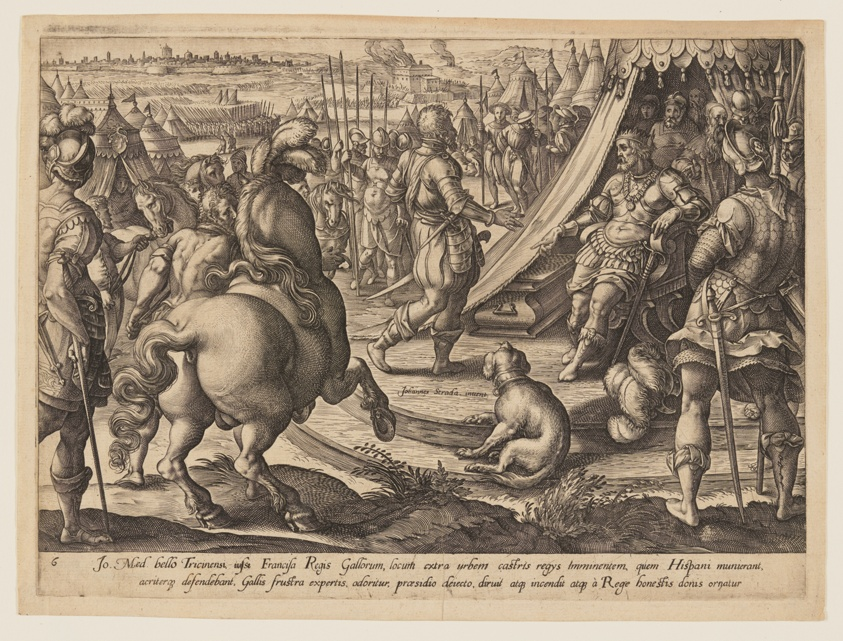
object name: Print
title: Giovanni de’ Medici before Francis I, plate 6 from The History of Giovanni de’ Medici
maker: Hendrick Goltzius (Dutch, 1558–1617); after Jan van der Straet (Flemich, 1523–1605); published by Philip Galle (Flemish, 1537–1612)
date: c. 1578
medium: Engraving on ivory laid paper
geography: Netherlands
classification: engraving; paper; print; prints and drawing